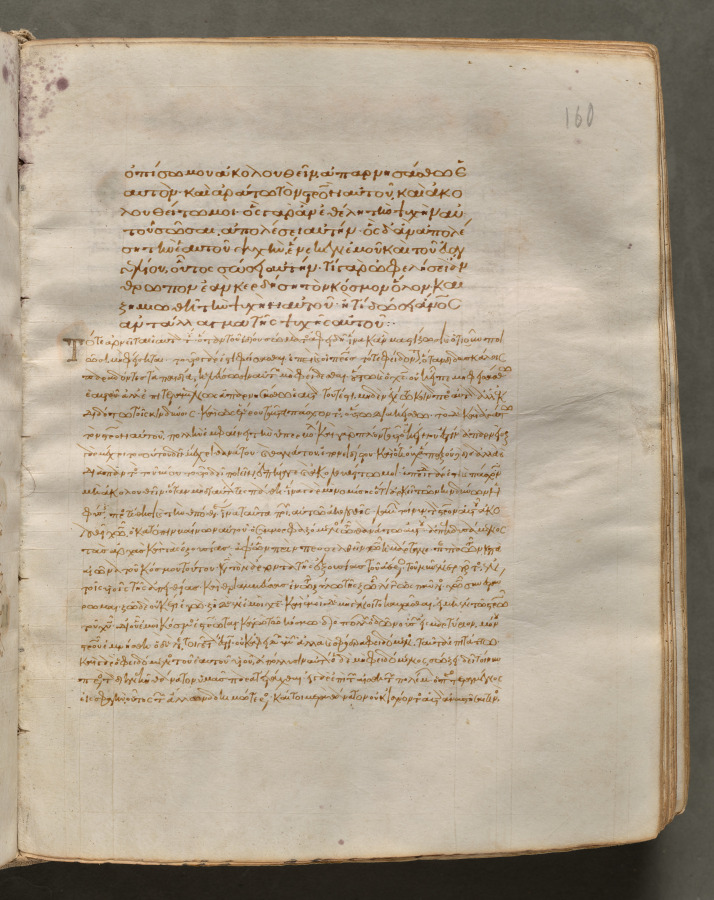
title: Text, folio 160 (recto), from a Gospel Book with Commentaries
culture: Byzantium, Constantinople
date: c. 1000–1100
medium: ink, tempera, and gold on vellum; leather binding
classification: Bound Volume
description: Each of the four gospels in this book opens on a page with brilliantly illuminated borders depicting the author of the text as well as birds-principally peacocks, symbols of the immortality of the soul-and fountains, representing the fountain of life and the salvation of the soul. This volume consists of 428 leaves with texts in Greek. Its level of sophistication suggests that it was probably written and decorated in a monastery in Constantinople.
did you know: Gospel Books were carried in procession through Byzantine churches.